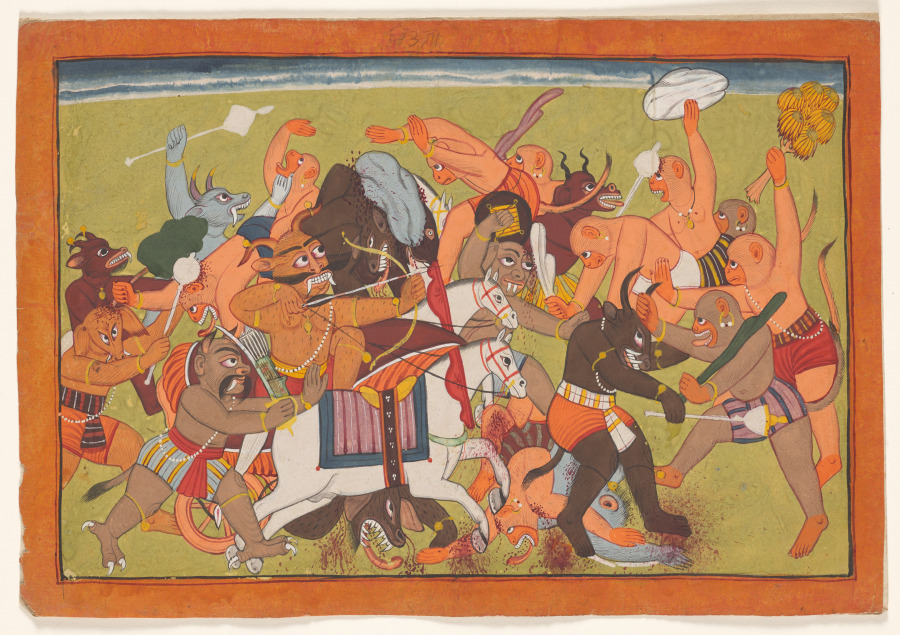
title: Battle between monkeys and demons, from the “Shangri” Ramayana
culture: Northern India, Pahari kingdoms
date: c. 1700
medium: Gum tempera and ink on paper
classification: Painting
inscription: Verso: in Devanagari 92 Laṃka; in Takri: 92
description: When the demon Ravana refused to return Sita to her husband, the divine hero Rama, Ravana sent his army to attack Rama. Rama’s army, made up mainly of monkeys from the forest, fought valiantly using only trees and rocks. The artist creates a tapestry of color and form to convey the confusion of battle.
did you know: Some of the monkeys bare their teeth in primal screams.